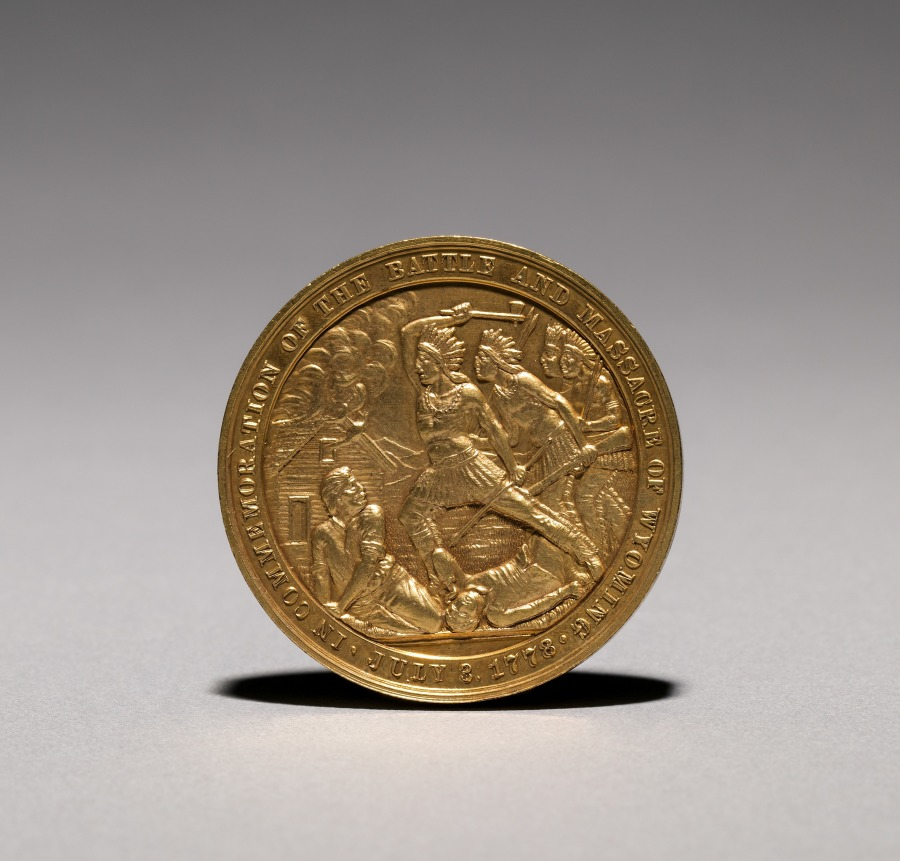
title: Medal: In Commemoration of the Battle and Massacre of Wyoming, 3 July 1778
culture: America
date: 1878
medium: gilt bronze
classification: Metalwork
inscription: In commemoration of the battle and massacre of Wyoming, July 3, 1777.